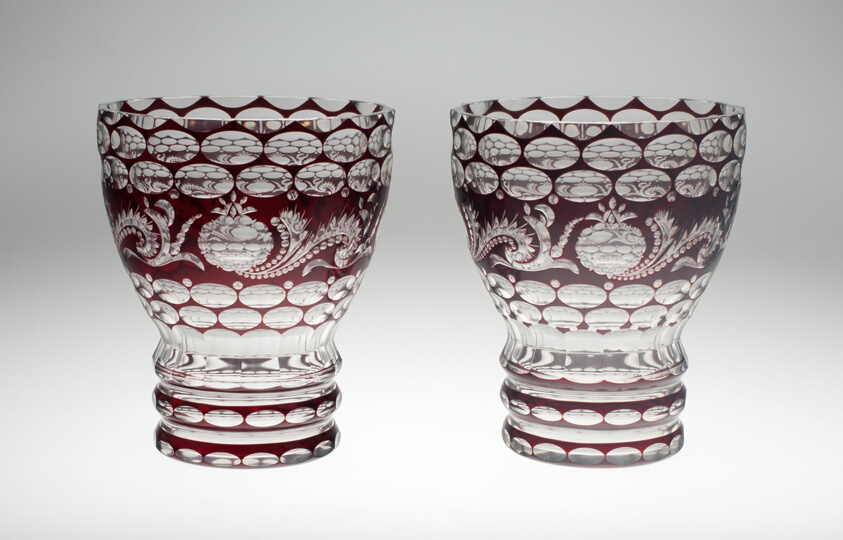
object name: Glass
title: Two Vases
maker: Bohemia, Czech Republic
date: Mid 19th century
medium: Glass; cut with ruby overlay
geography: Bohemia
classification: vase; glass; vessel; european decorative arts